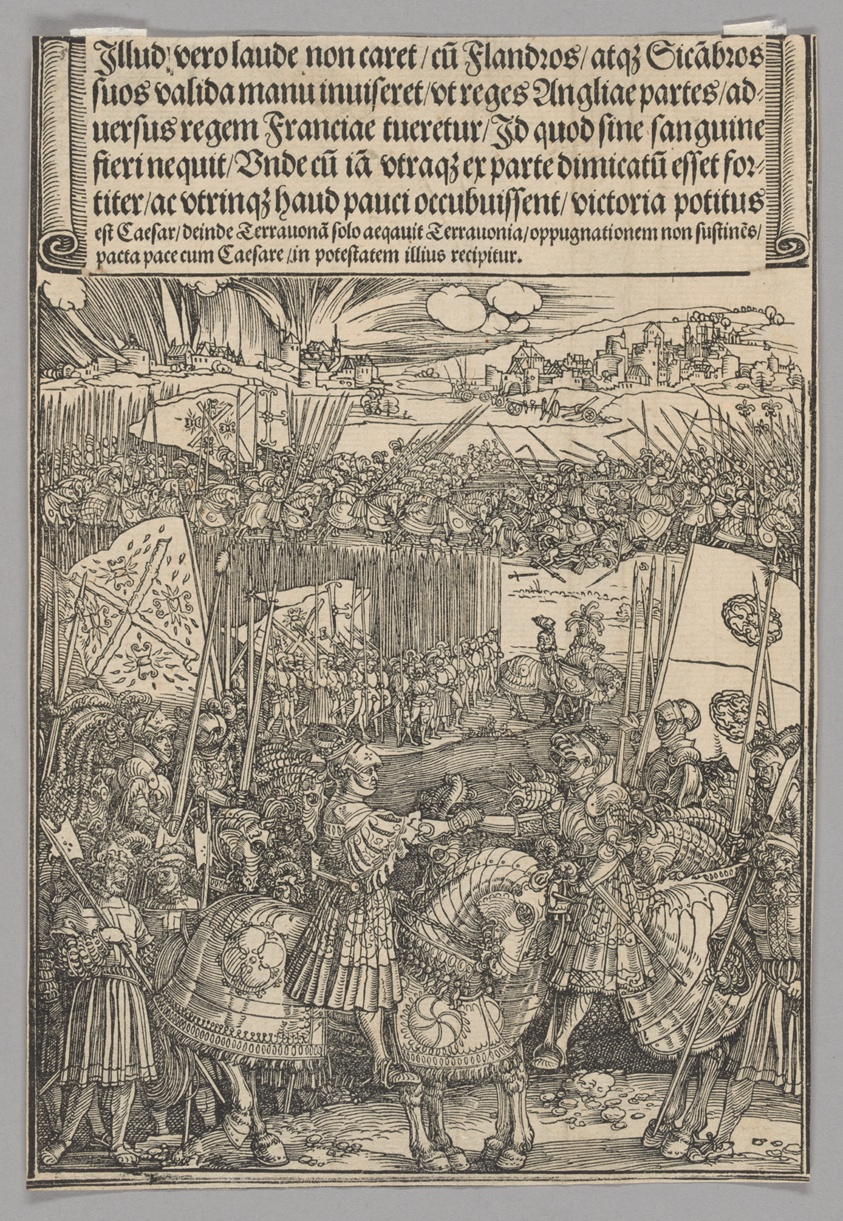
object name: Print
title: Maximilian and Henry VIII of England, plate 22 from Historical Scenes from the Life of Emperor Maximilian I from the Triumphal Arch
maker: Albrecht Dürer (German, 1471-1528); printed by Hieronymus Andreae (German, died 1556)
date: 1515-17, printed c. 1520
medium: Woodcut in black ink on cream laid paper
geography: Germany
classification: woodcut; paper; print; prints and drawing